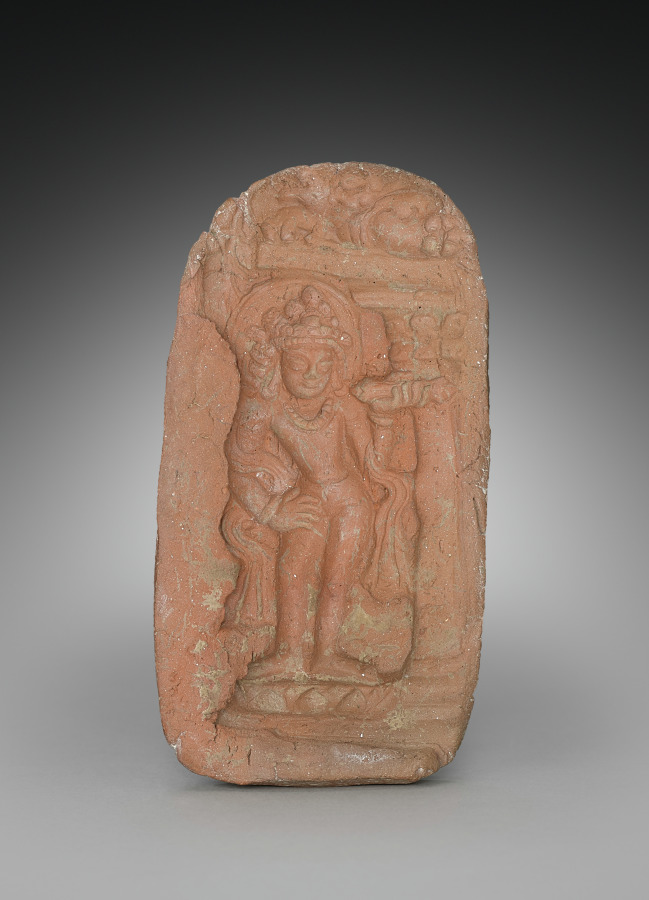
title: Mould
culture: India, Kashmir, 8th-9th Century (?)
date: 700s-800s(?)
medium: terracotta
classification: Ceramic